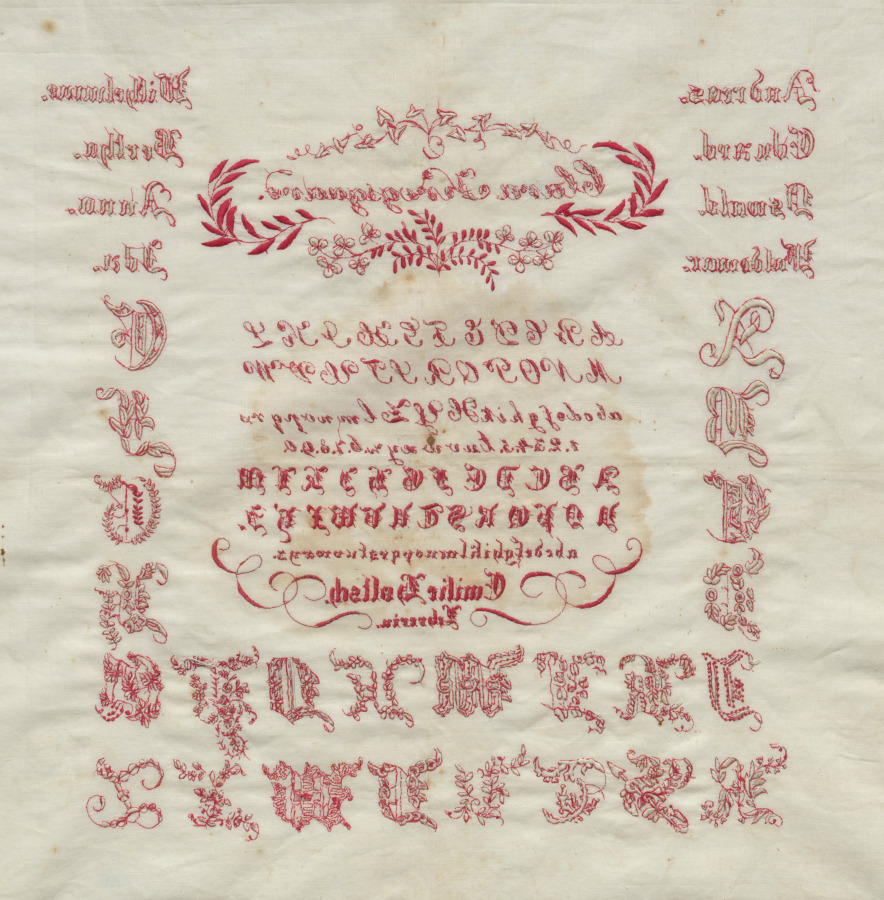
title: Sampler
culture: Germany, 19th century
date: 1800s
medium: embroidery; cotton on cotton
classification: Sampler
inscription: top center: "Clara Krogsgaard"; upper left: "Andreas./ Eduard./ Oswald./ Waldemar."; upper right: "Wilhelmme./ Bertha./ Anna./ Ida."; center, rows of alphabet and numerals, below: "Emilie Boltsch./ Lehrerin"; on either side and below center alphabet and numerals, another set of alphabet.